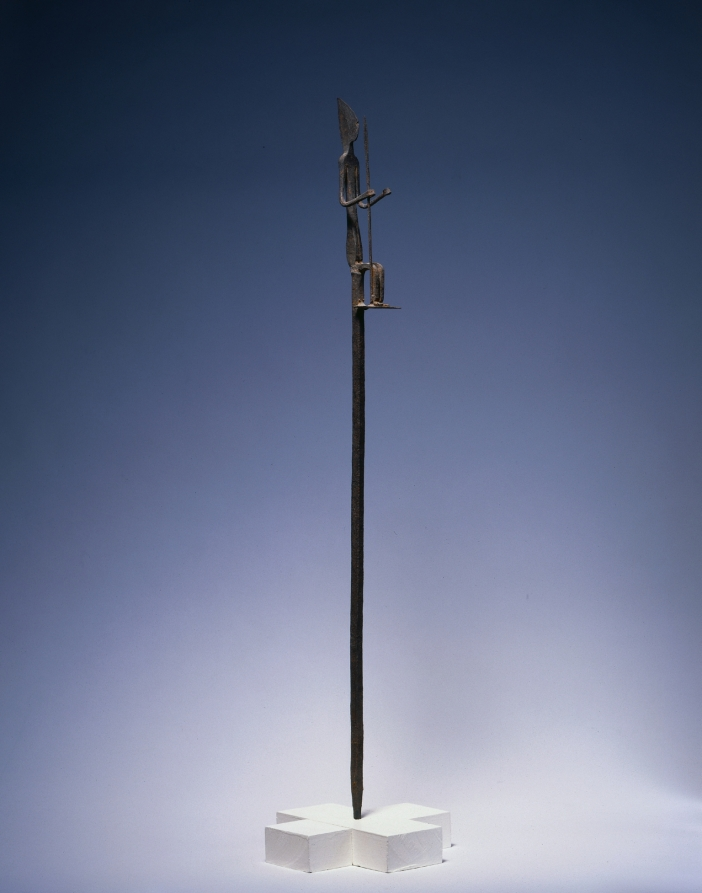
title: Staff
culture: Africa, West Africa, Mali, Bamana-style blacksmith-carver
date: 1900s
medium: Iron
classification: Implements